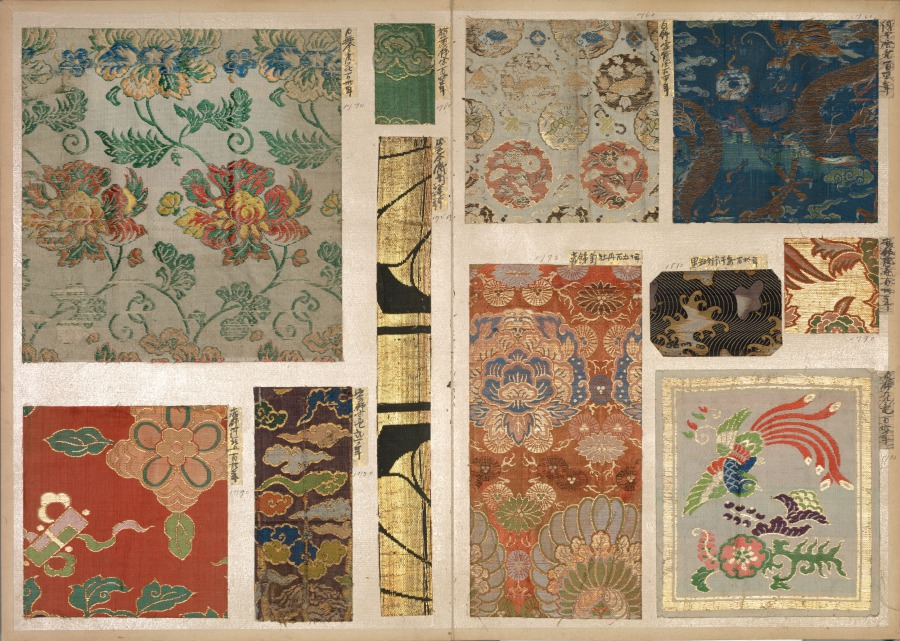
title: Album of Textile Samples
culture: Japan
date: 1790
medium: silk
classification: Textile